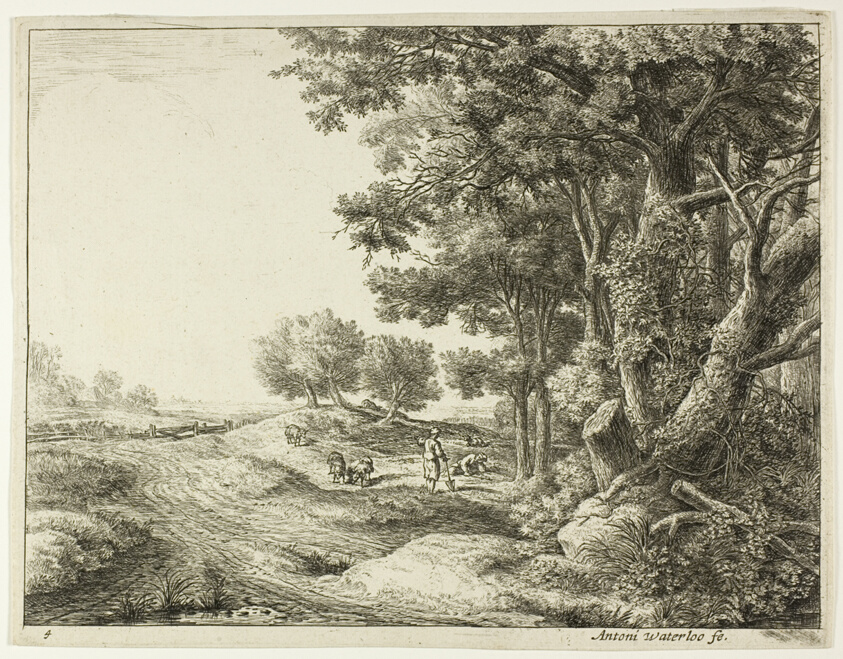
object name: Print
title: Peasant with a Shovel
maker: Anthonie Waterloo (Dutch, c. 1610-1690)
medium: Etching on paper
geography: Holland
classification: etching; print; prints and drawing